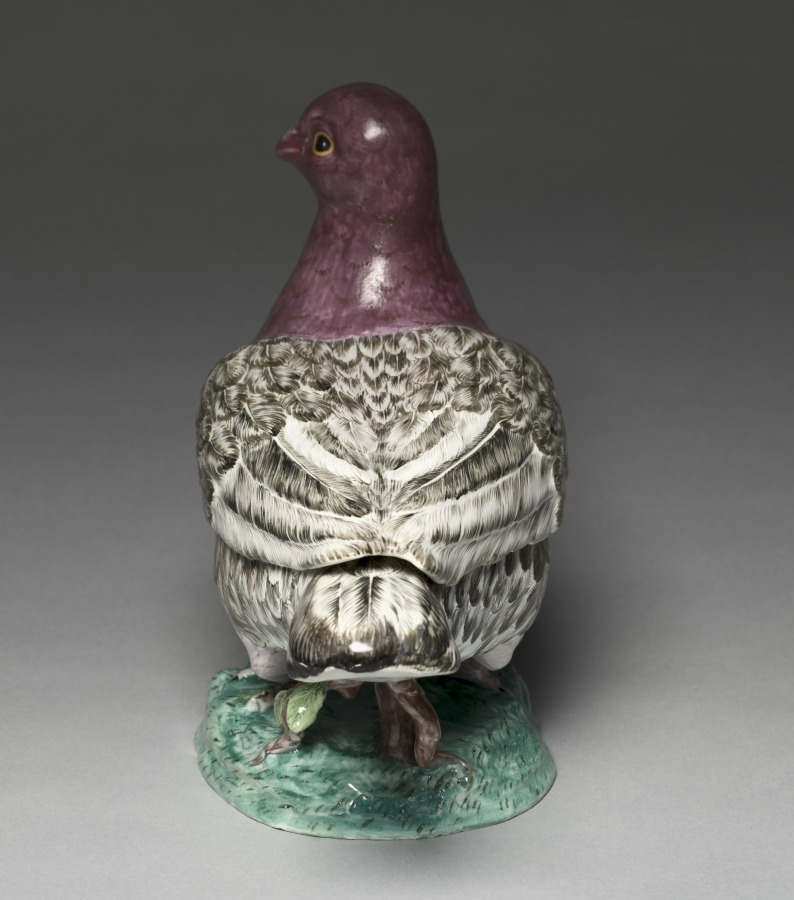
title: Covered Tureen in the Form of a Pigeon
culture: France, 18th century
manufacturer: Sceaux Factory (French, active 1748–66)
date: c. 1760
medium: Tin- glazed earthenware (faience) wth enamel decoration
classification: Ceramic